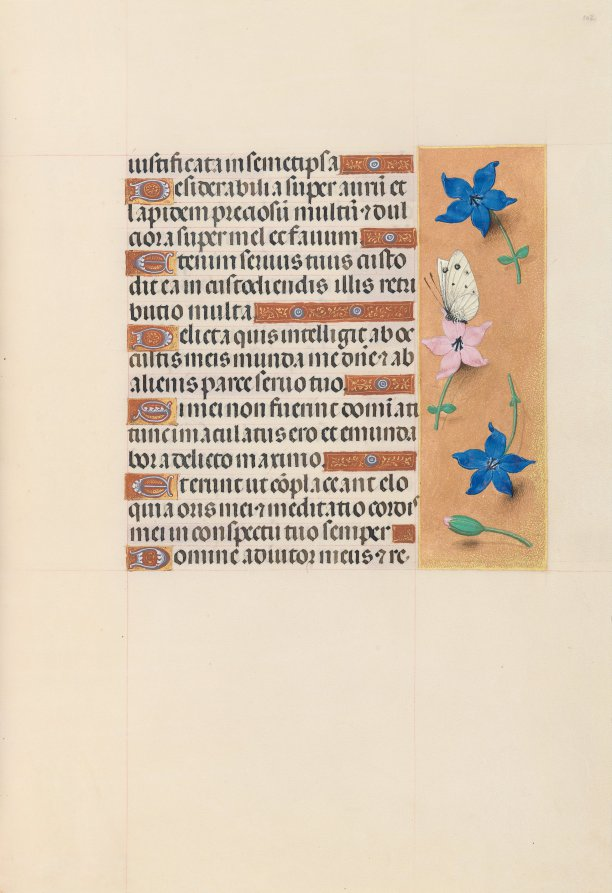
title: Hours of Queen Isabella the Catholic, Queen of Spain: Fol. 102r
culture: Flanders, Ghent and Bruges, late 15th century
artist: Master of the First Prayerbook of Maximillian (Flemish, c. 1444–1519)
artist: and Associates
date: c. 1500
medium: ink, tempera, and gold on vellum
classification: Bound Volume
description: This manuscript was illuminated by a circle of at least five highly organized manuscript painters active in the Flemish cities of Ghent and Bruges. The principal illuminator was Alexander Bening, who painted the majority of the book's miniatures. Manuscripts produced by this circle of artists are renowned for the decoration of their borders, which typically feature a rich variety of realistically-painted flowers, birds, and butterflies. This prayer book, called a book of hours, was intended not for a cleric, but for the private devotions of a lay person-in this case, Isabella the Catholic, Queen of Spain (1451-1504). Isabella's coat of arms embellishes the book's frontispiece. It is unlikely that the book was commissioned by the Queen herself; rather, she probably received it as a diplomatic gift from someone courting her patronage, perhaps Cardinal Francisco Jimenez de Cisneros. A Franciscan friar, Jimenez was dependent upon Isabella for his advancement, first to the post of Queen's confessor in 1492, and then to Archbishop of Toledo in 1495.